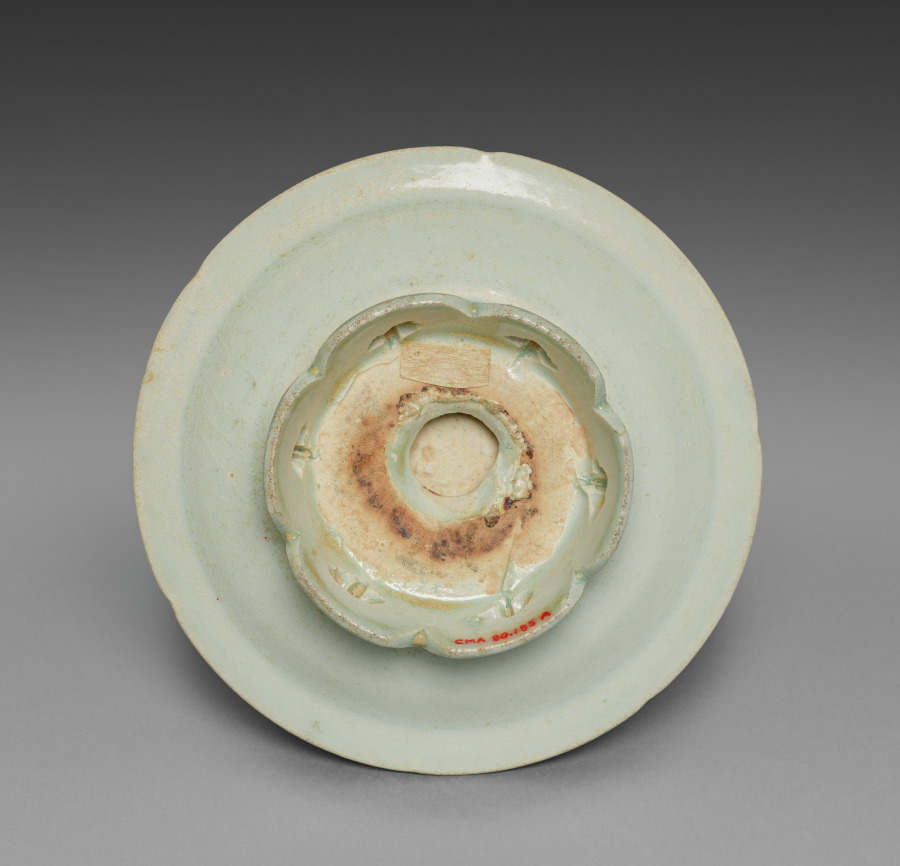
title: Cup and Stand (stand)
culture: China, Southern Song dynasty (1127-1279)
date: 1100s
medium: glazed porcelain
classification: Ceramic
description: The kilns of Jingdezhen in Jiangxi province produced an extremely delicate porcelain made from the local resources of kaolin (white China clay) and petuntse (a feldspathic rock called china stone). It is glazed with a clear bluish-white glaze, thus the name qingbai (blue-white) or yingqing (shadowy blue) for this type of ware.